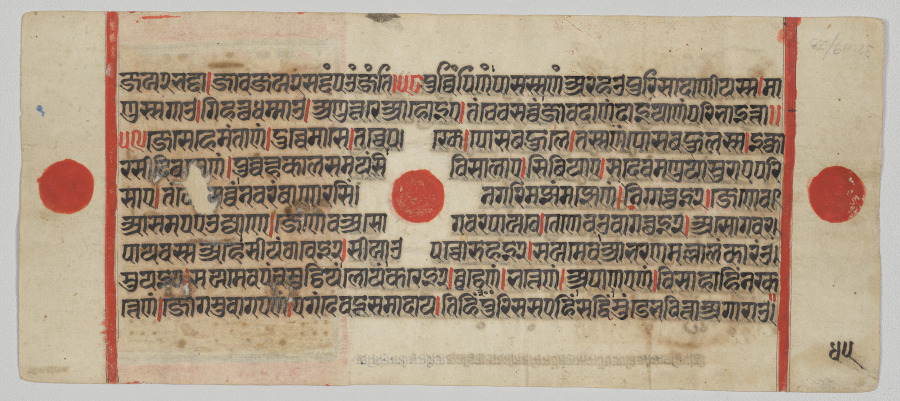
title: Text, Folio 45 (verso), from a Kalpa-sutra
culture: Western India, Gujarat, late 15th-early 16th century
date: c. 1500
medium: Gum tempera, ink, and gold on paper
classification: Painting